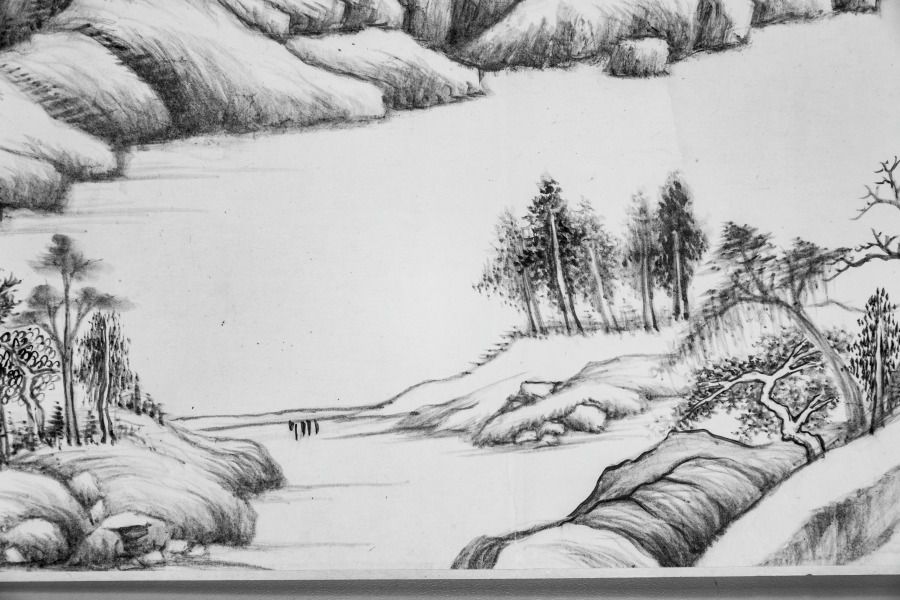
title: River and Mountains on a Clear Autumn Day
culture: China, Ming dynasty (1368–1644)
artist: Dong Qichang (Chinese, 1555–1636)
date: c. 1624–27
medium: Handscroll; ink on Korean paper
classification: Painting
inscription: 黃子久江山秋霽似此，當恨古人不見我也。思翁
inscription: 董文敏每遇高麗鏡面箋，書畫尤為入神。此卷改表紙用之，字跡隱然，兼有朝鮮之印。至於筆法圓秀，真接倪黃。豈文沈所可同日而語也。 康熙庚午中秋後一日，天氣澄爽，重裝初畢，跋於瓶廬。抱瓮翁高士奇。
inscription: Second inscription by Gao Shiqi 高士奇 (1645–1704): On the twenty-third day of the ninth month, the jiaxu year of the Kangxi era [1694], I packed my bags to head north. When my boat passed Wuchang [Suzhou], Mr. Mantang [Song Luo] brought wine to bid me farewell so that we could share our thoughts on our separation in the last few years. I showed him the paintings and calligraphy which I collected and asked his opinions. Since Mr. Mantang does not own any handscrolls by Wenmin [Dong Qichang], I leave this one for him in commemoration of our parting; thus the painting will have a worthy owner and our meeting will become a beautiful story in the future. It is the fourth day after the beginning of winter, with the sky clear and sober. Trees under frost have turned red and yellow, seemingly echoing the brush and ink in the painting. I also ask Mr. Mantang to inscribe a poem to commemorate our meeting so that it will survive forever.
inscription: 1 colophon and 4 seals of Song Luo 宋犖 (1634–1713): Who is the foremost art connoisseur of our dynasty?/ Tangcun [Liang Qingbiao, 1620–1691] is dead, so the title passes to Jiangcun [Gao Shiqi]./ Leaving office, you retired for five years in the Lake region./ Fondling handscrolls and hanging scrolls from morning to evening./ You sent me your collection catalogue Xiao Xia Lu last year;/ It is indeed the true equal of [Zhou Mi's] Yun Yan Guo Yan./ This year you returned to the capital by imperial order;/ Your boat with calligraphy and paintings anchored at the river bank in Suzhou./ When we met each other you did not waste any time for conversation by poured out immediately/ From your "coral net" extraordinary treasures./ You produced incomparable scrolls, with gold-inscribed labels and jade rollers,/ Pouring out from bags and trunks, they were spread in disarray./ Without a word, I rolled and unrolled until my fingers were numbed,/ We sat straight, facing each other quietly, and never felt tired./ For three days we forgot about sleeping and food./ And at times we shouted our joy out loud, forgetting who is host or guest./ Your Dwelling in the Fuchun Mountains and the Yuansheng manuscript/ These peerless works I myself examined with delight./ As an added pleasure to the farewell dinner under the Maple Bridge,/ You allowed me to hold again this handscroll by Dong Qichang--/ The Misty River and Piled Peaks [by Zhao Mengfu] and this Clear Autumn Day are two extraordinary masterpieces./ In showing such life and spirit with "qi yun." the artists were truly "men of heaven."/ The Clear Autumn Day is not even three feet long,/ Painted on tributary Korean paper, it shines like silver./ Every building up and every turn of the mountains imitates nature,/ Every tree and every rock is removed from the commonplace./ From the beginning, the theory of poetry is the theory of painting,/ Like the lotus and the morning sunshine, they complement and refresh each other./ The artist's inscription regrets that "the Old Masters cannot see my scroll."/ Huang Gongwang would have agreed in his grave./ The vermilion of the seals glitter and dazzles the eyes,/ These added accessories are as valuable as jade./ You are very kind to give it to me,/ The feelings expressed in your inscription are so sincere./ Wanting to refuse, but unable, I accept it to respect your wish,/ And taking off my gown and cap I wrapped it with care./ You asked me to write a long poem in commemoration of this beautiful occasion,/ I am too ashamed that my effort in response is so poor and inadequate./ Returning home, I unrolled it under candlelight, trying to write the colophon,/ The light of the waning moon shines at the foot of the mossy wall./ Earnestly humming and brows knit in deep thought, I try to compose;/ The verses are not outstanding, but the facts are real./ With this poem recorded at the end of the scroll, I mail it to you for approval,/ This poem and this painting shall outlast a thousand springs. (Translation by LYSL/HK/WKH)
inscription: 1 colophon and 2 seals of Shao Changheng 邵長蘅 (1637–1704); 2 inscriptions and 14 seals of the Qianlong 乾隆 emperor (r. 1736–95); 1 seal of the Jiaqing 嘉慶 emperor (r. 1796–1820); 3 seals of the Xuantong 宣統 emperor (r. 1908–11); 1 seal unidentified.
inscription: [印] 朝鮮國王之印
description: Dong Qichang had a tremendous impact on the artistic practices and historiography of later generations; his works and writings shaped literati aesthetics. Here, Dong places an abstract landscape composition diagonally across the picture plane, configured to recall earlier masters and simultaneously express his own personal style. Dong’s inscription claims, Huang Gongwang’s Autumn Day, looks like this. I truly regret the master has not seen my work. In fact, Dong Qichang may have had Dong Yuan’s Xiao and Xiang Rivers in mind, a work he owned and considered a key work in Chinese art history.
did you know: The painting has an imprint of a Korean seal that reads "Seal of the king of Joseon."